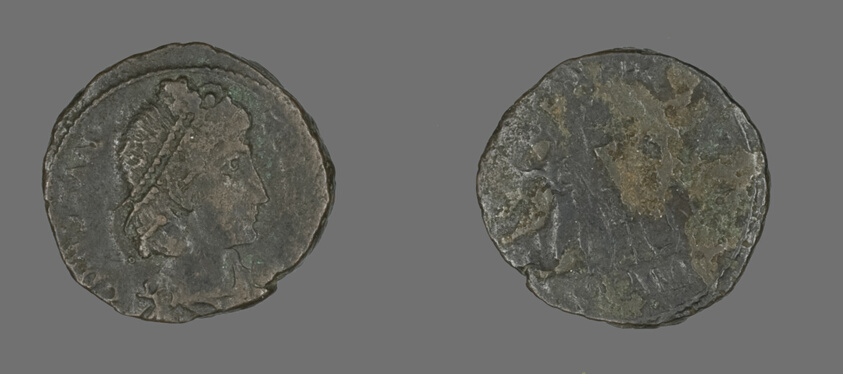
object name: Coin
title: Coin Portraying Emperor Constantius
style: roman (ancient, style or period), ancient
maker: Roman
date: 250-306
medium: Bronze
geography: Roman Empire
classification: coin; ancient art